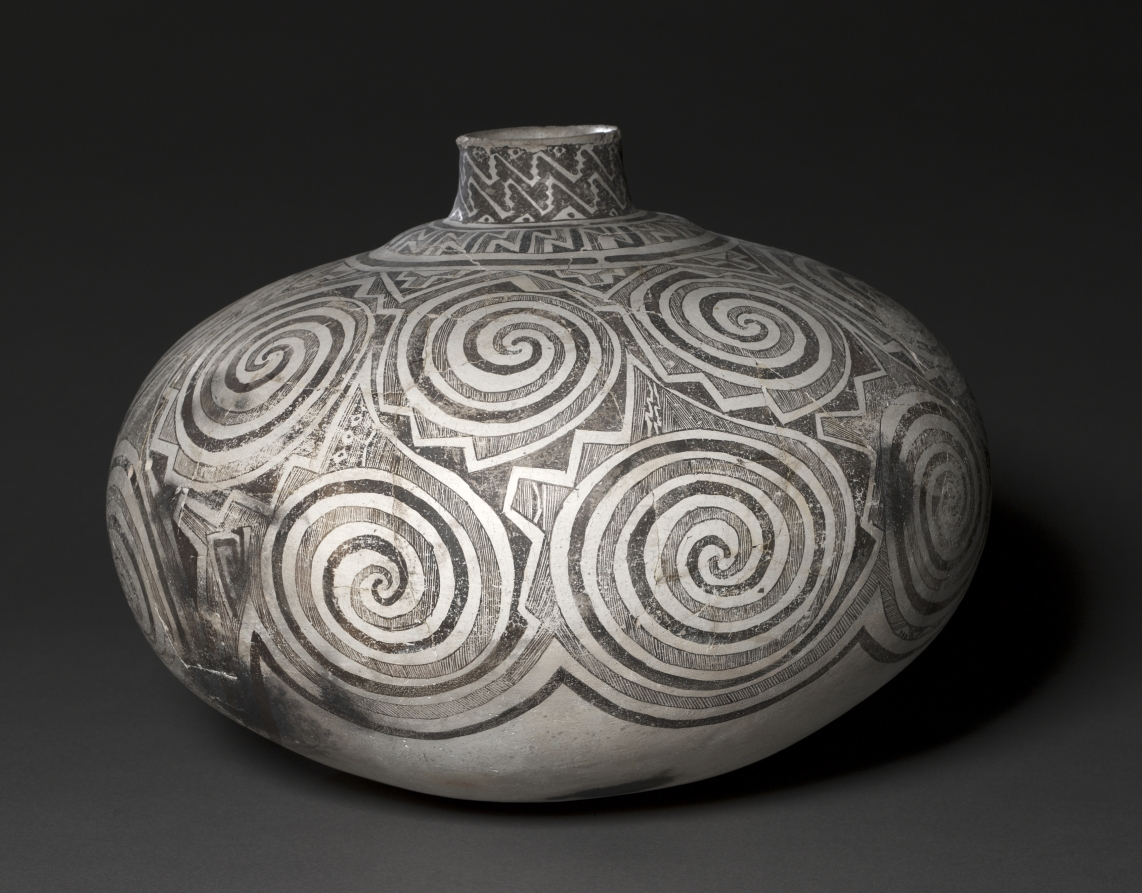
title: Water Jar (Olla)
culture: Southwest, Ancestral Pueblo, Tularosa Black-on-White style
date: 1150–1325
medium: Ceramic, slip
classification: Ceramic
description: Ancestral Pueblo ceramics feature striking black-and-white geometric motifs, here interconnected spirals interrupted by jagged lines. Meaning is unknown, but the complex pattern is reminiscent of water that eddies as it runs over rocks. With recent exceptions, pottery is a women’s art among modern Pueblo peoples who descend from the Ancestral Pueblo; the same was likely true in the ancient past. As today, the potter created her wares by coiling ropes of clay atop one another, smoothing and further shaping them, and then applying decoration with brushes made of maguey (agave) or yucca leaf chewed until the fibers formed bristles.